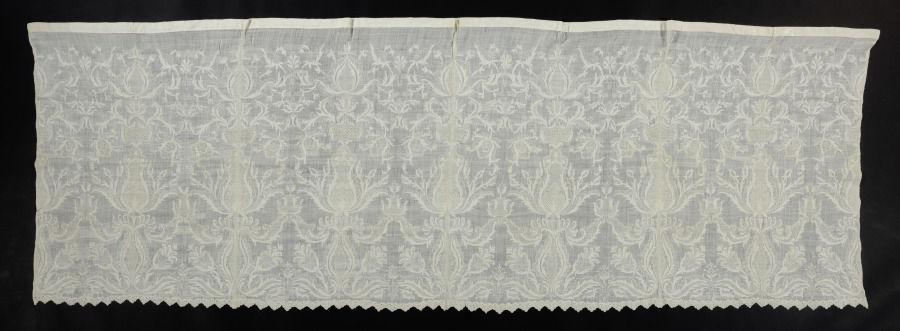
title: Lace Flounce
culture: Unassigned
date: 1700s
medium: Plain weave linen: embroidered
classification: Embroidery